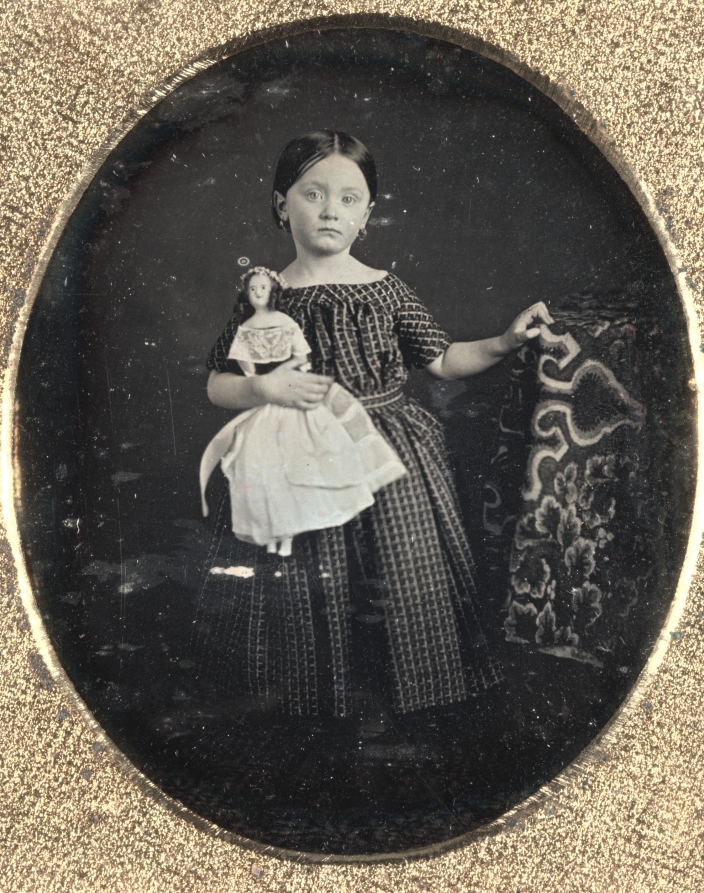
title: Girl with Doll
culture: America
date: 1850s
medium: daguerreotype, sixth plate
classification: Photograph